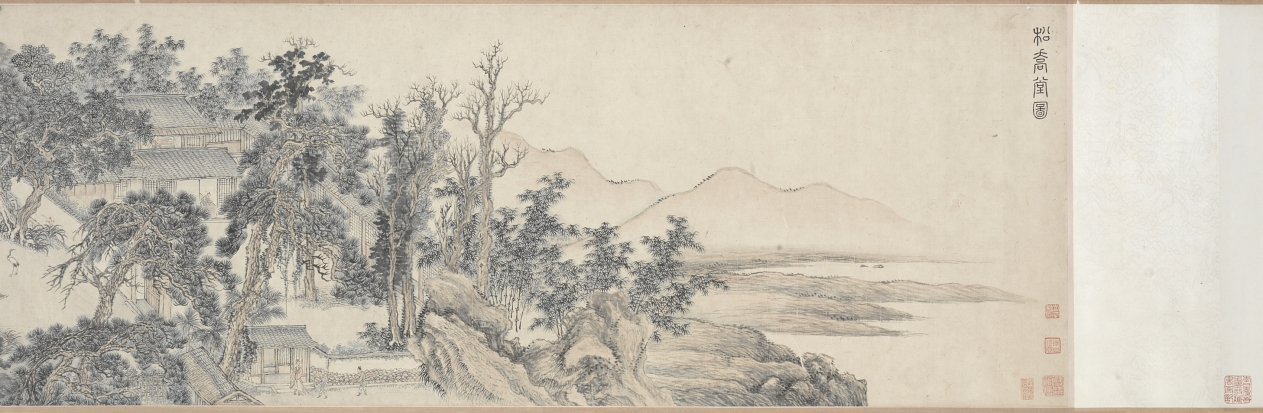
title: Hall of Lofty Pines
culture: China, Qing dynasty (1644-1911)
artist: Wang Hui (Chinese, 1632–1717)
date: 1703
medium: handscroll; ink and color on paper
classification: Painting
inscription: [題] 松喬堂圖 康熙癸未夏六月, 海虞耕煙散人王翬畫。[印]王翬之印; 石谷. [左下] 來青閣; 耕煙野老時年七十有二.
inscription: 松喬堂圖一卷，海虞石谷王君為靜海近公厲少司冦公作也。圖成于癸未之夏。未幾而公遂仙去。公令子今編修君南湖屬余題跋其後。余與公同官侍從，交契最深。側見公之清修純德，蔚為聖天子所眷重。侍直內廷，密勿贊襄，幾二十餘年。蒼生之所以受賜，士林之所以沐德者，天下莫能窺，在廷莫能悉。而公卒不言。以故宸衷日益契，恩禮亦日益渥。雖年逾懸車，時有歸老之念。而上固不聼公之去。其所謂松喬堂者，御書以賜公者也。蓋以松比公之清風勁節，而歲寒不改，經霜彌茂。則又以期公之壽考未有艾焉。公知此身未易乞，而山林槃磵之樂，止可寄諸寤思。此松喬堂圖之所由作也歟。石谷此圖，結構精密，筆墨超邁。其寫樹木之蒼蔚，堂宇之靚幽。恍見摩詰輞川樂天廬山之勝。獨惜公未得一日徜徉故園以償其願。即繪於圖亦未得以永其趣，此編修君之所以眷眷不忘也。雖然千歳之松喬，下蔭百畝，上以修棟梁之需。然則上當日名堂之意，不更望於後之人襲其芘而養其材也哉。吾願編修君之寶斯圖。并望君之塗塈丹雘，大其堂構也已矣。 康熈丙戍重陽三日，雲間王鴻緒跋。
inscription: 10 additional seals: 1 seal of Li Duna 勵杜納 (1628–1703); 4 seals of Zha Ying 查瑩 (jinshi of 1766); 5 seals of Li Yun (dates unknown).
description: Wang Hui 王翬, a leading painter in the orthodox school of the early Qing dynasty (1644–1911), was commissioned to paint this landscape with a country estate for Li Duna 勵杜納 (1628–1703), vice minister of justice in Emperor Kangxi’s court. The emperor had honored Li by granting him a piece of calligraphy with the name of Li’s retirement retreat, “Hall of Lofty Pines.” He drew a comparison between pines and Li’s upright character, resilience, and longevity. Wang Hui’s painting was supposed to allow Li to imagine living in a beautiful, secluded compound among the hills and pines. Sadly, Li died before seeing the completed painting and before receiving the emperor’s permission to retire. The landscape begins with peaceful riverbanks and low hills. The pines around the estate in the middle of the handscroll are truly lofty, some stretching even beyond the frame of the painting. Li Duna, the estate’s owner, is shown twice in his serene mountain retreat: first approaching the entrance to the compound with two servants at the right, and then later in the scroll, to the left, reading in the comfort of an inner room.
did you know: One servant carries the estate owner's carefully wrapped qin, a type of zither.